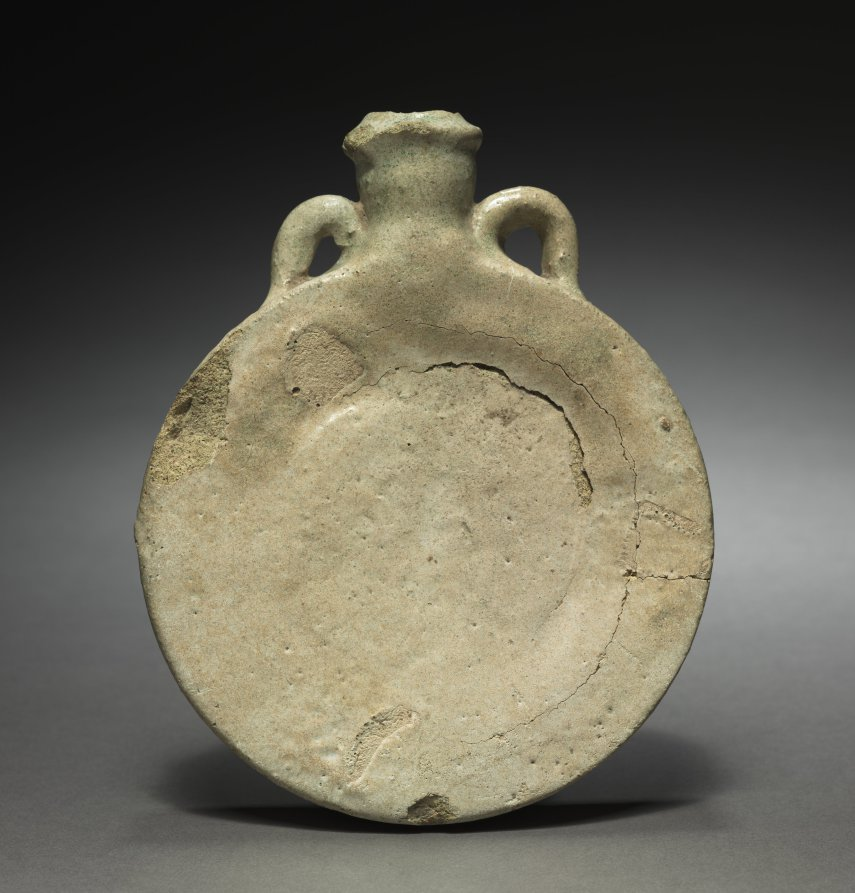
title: Pilgrim Flask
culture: Parthian Empire (247 BCE–224 CE)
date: 1–200 CE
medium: terracotta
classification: Ceramic